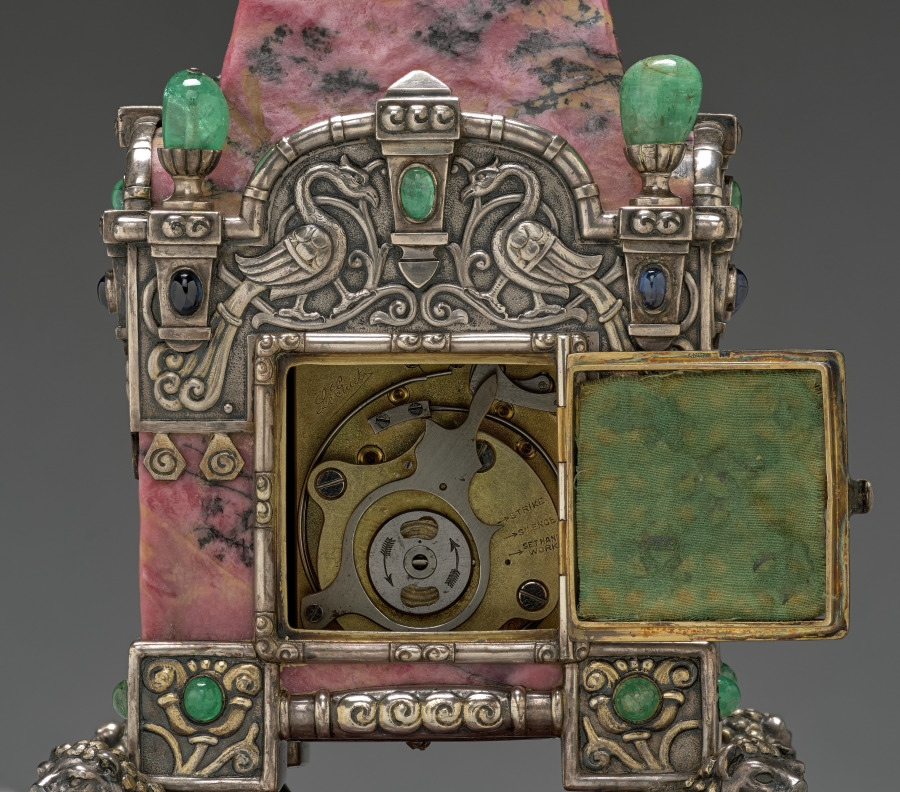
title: Kremlin Tower Clock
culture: Russia, St. Petersburg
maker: House of Fabergé (Russian, 1842–1918)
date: c. 1913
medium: rhodonite, silver, enamel, emeralds, sapphires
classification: Timepiece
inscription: 84, Kokoshnik, delta [assay mark for Moscow, 1908-26]; 91, Kokoshnik; 91; Kokoshnik; C. Fabergé (in Cyrillic); double-headed eagle [imperial warrant]; 16419 k? scratched.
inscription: Painted on clock face: Le Gruet (in script); strike, silence, set hand work (in English).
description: The use of Russian hardstones in creating precious objects became a hallmark of design from the House of Fabergé. Easily carved, these minerals were sourced largely from the western region surrounding the Ural Mountains. Fabergé's workmasters used colorful stones such as agate, nephrite (jade), lapis lazuli, rock crystal, and rhodonite, seen here in this elaborate table or mantel clock, to create all manner of luxurious accessories. Bright pink rhodonite was among the rarest, and consequently most expensive, specimens used by the House of Fabergé. This clock resembles the Taynitskaya Tower, the middle tower on the south side of the Kremlin. The House of Fabergé created this work to commemorate the 300th anniversary of the Romanov dynasty, representing Fabergé's ability to balance the functionality of objects with intricate decorative design.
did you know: The Kremlin tower, which this clock resembles, has a secret well and an underground tunnel that leads to the Moscow River.